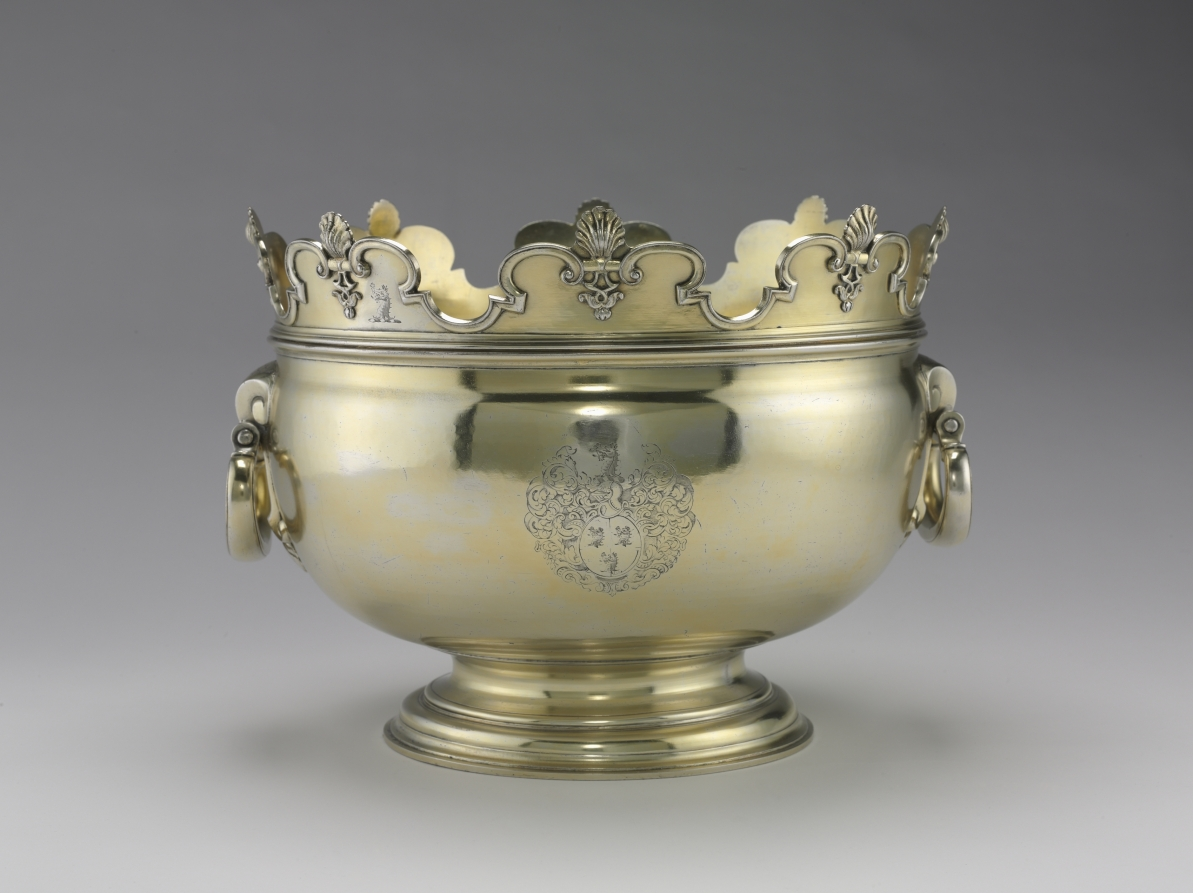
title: Monteith Bowl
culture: England, London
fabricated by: Benjamin Pyne (English, active 1693–1727)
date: 1715–16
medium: silver gilt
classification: Silver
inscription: engraved, center of bowl: arms, crest of Byam family (mantling and helmet were probably engraved at time bowl was made, crest and arms were altered to those of Byam at later date). Rim engraved with Byam Crest (also presumably not original).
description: This bowl’s notched rim allows for glasses to be suspended in water for cooling and cleansing between courses during a long dinner. The rim can be removed and the bowl used for punch as well. A year before Benjamin Pyne began this bowl, he was appointed Subordinate Goldsmith to the King in preparation for George I’s coronation (r. 1714–1727). Like much of his work, this Monteith bowl is characterized by its scale and simplicity.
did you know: The name Monteith is said to come from a mythical Scotsman named Monteigh, who wore cloaks with a similar notched pattern.